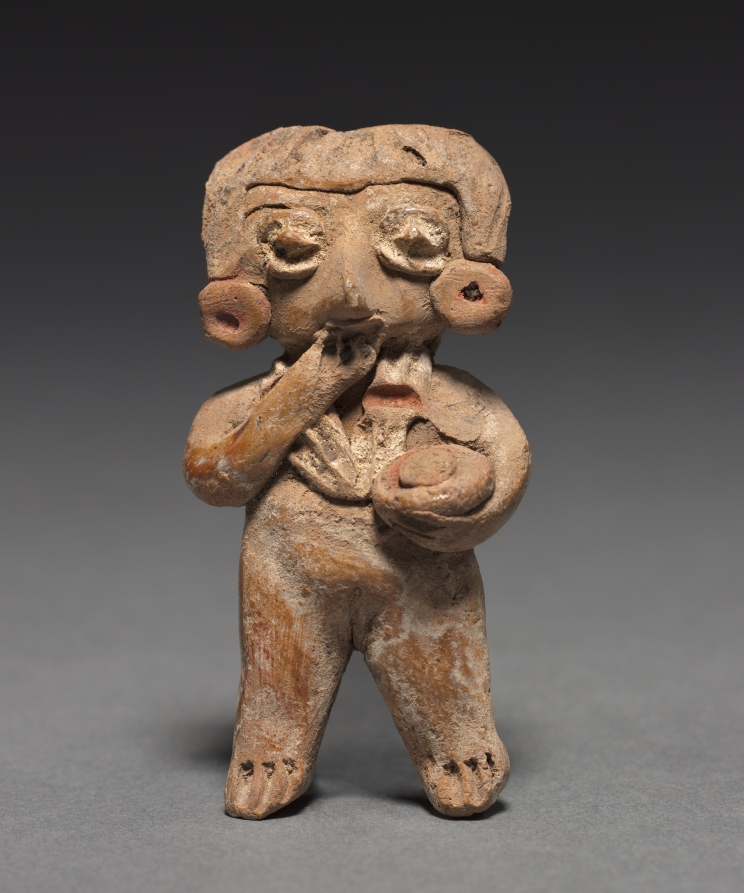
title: Female Holding A Bowl Figurine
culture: Mesoamerica, Guanajuato or Michoacán, Chupícuaro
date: 600 BCE–250 CE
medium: Ceramic, pigment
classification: Sculpture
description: Small, solid, hand-modeled figurines were a staple of the early Mesoamerican artistic repertoire. Made in distinctive styles corresponding to geographic regions, they likely were used in a variety of contexts, including rites to assure health, fertility, and prosperity. This example is from the Chupícuaro region, north of modern-day Mexico City.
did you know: Small, solid, hand-modeled figurines were a staple of the early Mesoamerican artistic repertoire.